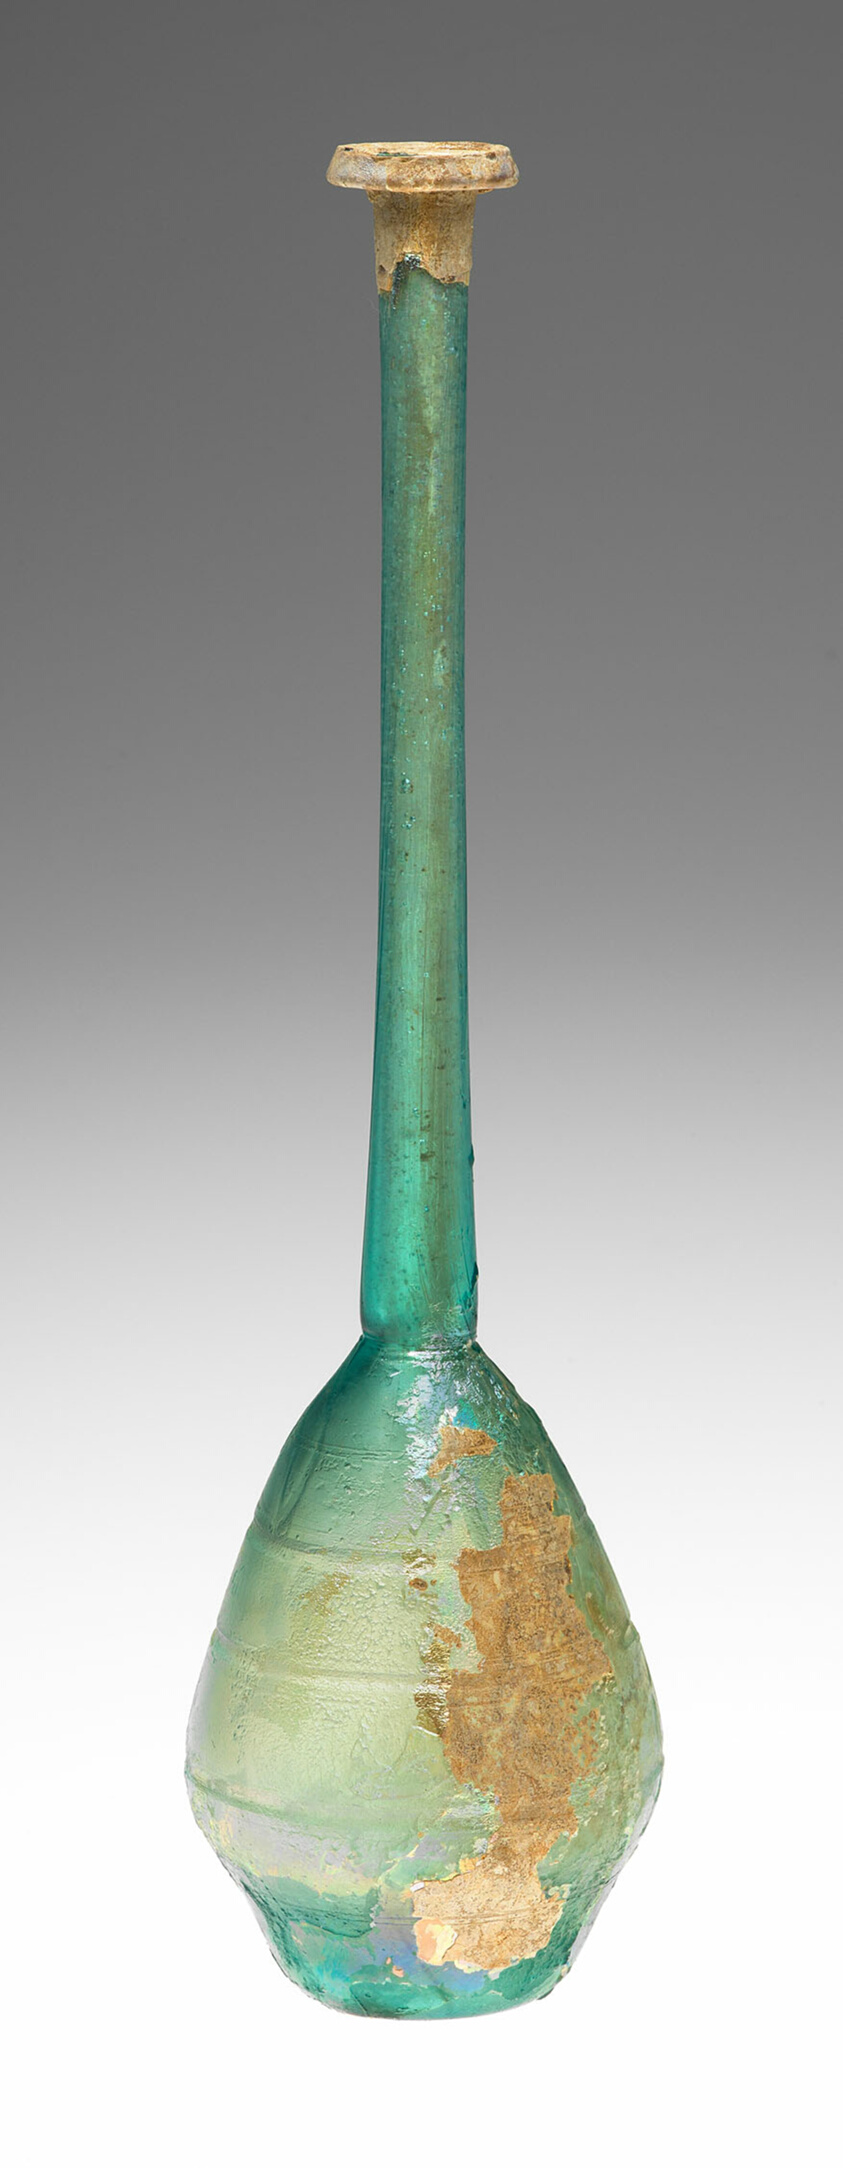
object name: Vessel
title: Bottle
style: syrian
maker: Roman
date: 2nd-3rd century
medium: Glass, mold-blown technique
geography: Roman Empire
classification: bottle; glass; vessel; ancient art